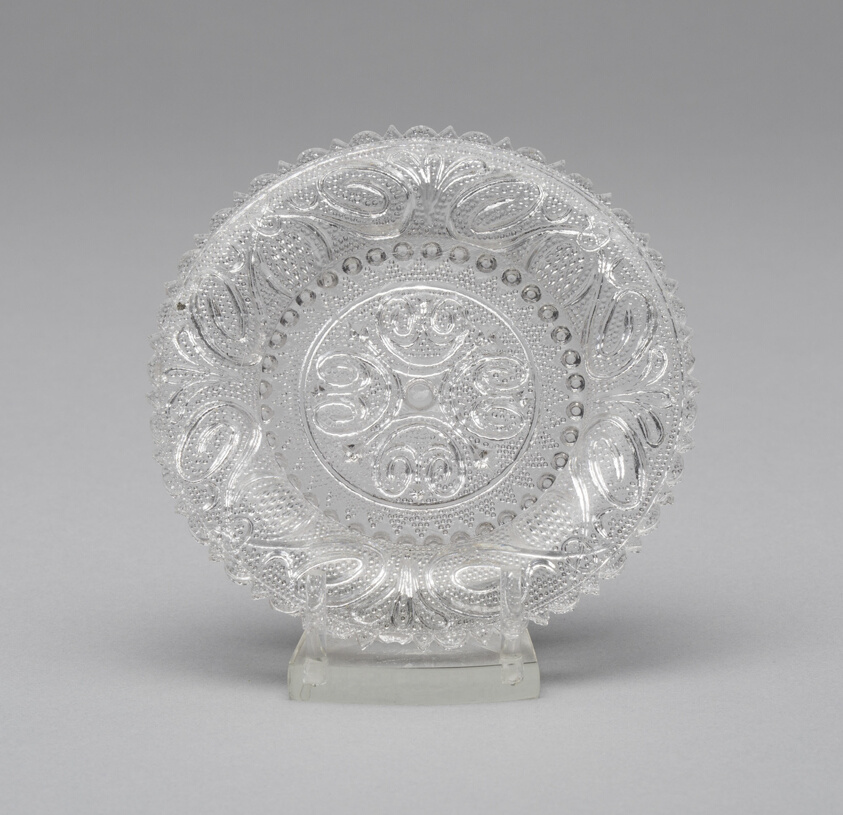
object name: Glass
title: Cup plate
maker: Artist unknown (American, 19th century); Pennsylvania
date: 1800–35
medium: Pressed glass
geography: Pennsylvania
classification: plate (general, dish); glass; american decorative arts; american arts; decorative arts